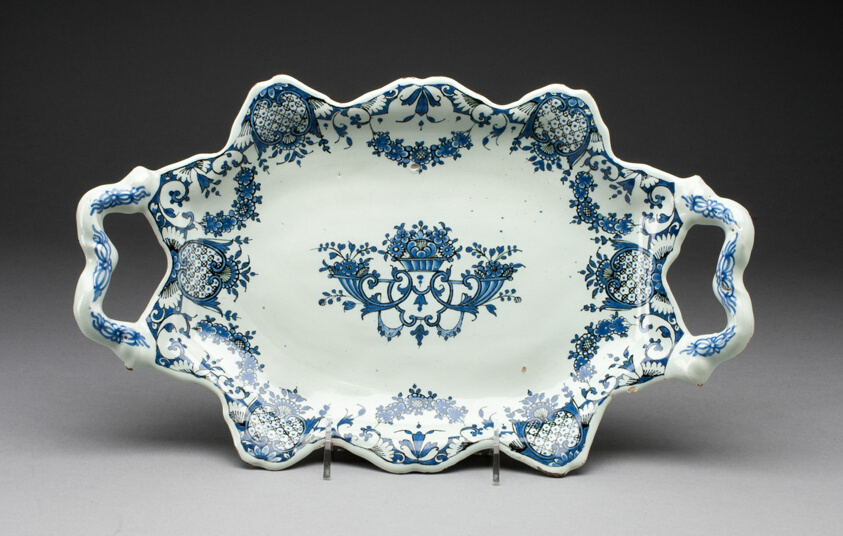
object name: Ceramics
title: Tray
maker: France, Rouen or Lille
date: c. 1700/20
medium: Tin-glazed earthenware (faience)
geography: Rouen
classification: tin-glazed ware; earthenware; european decorative arts; ceramics